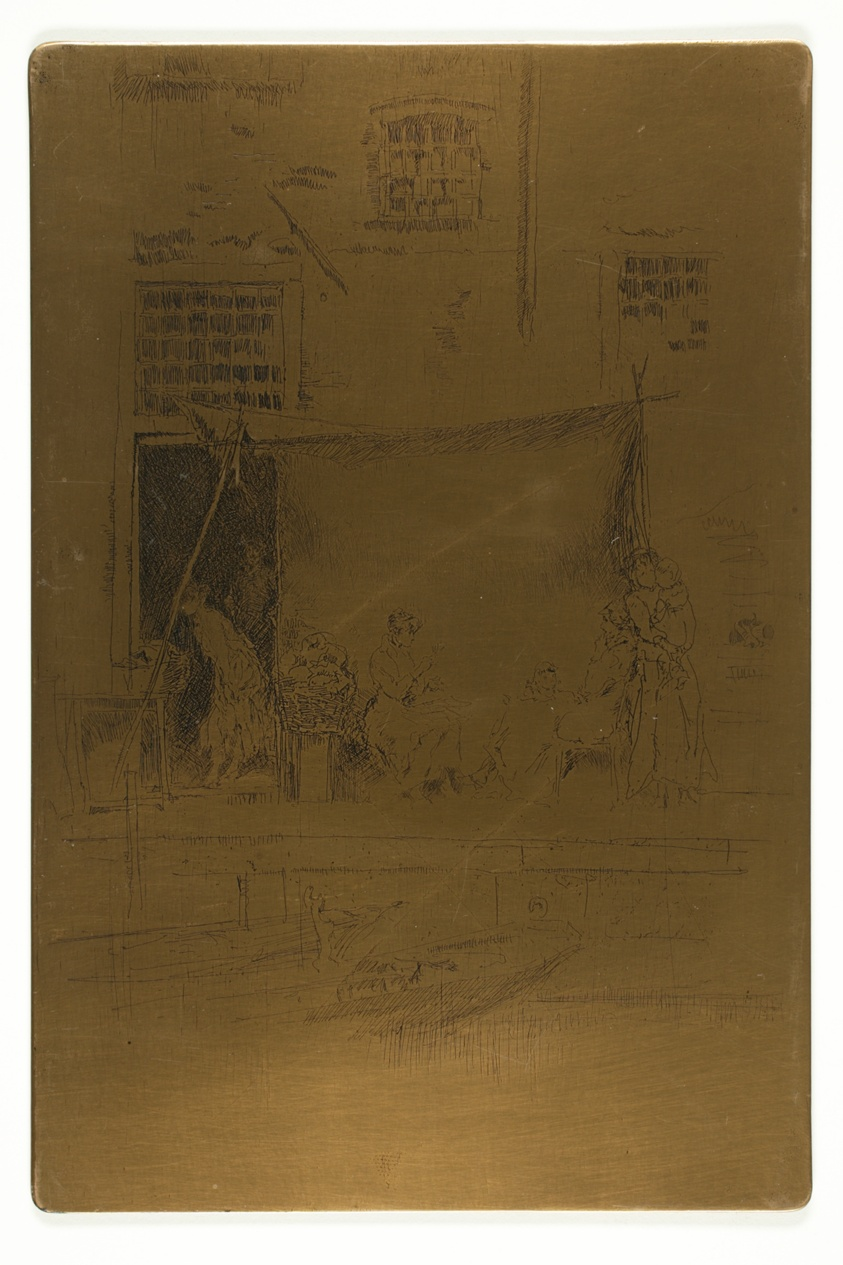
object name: Print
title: Fruit Stall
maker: James McNeill Whistler (American, 1834-1903)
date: 1879/80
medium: Cancelled copper plate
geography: United States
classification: copper plate; matrix; prints and drawing; print